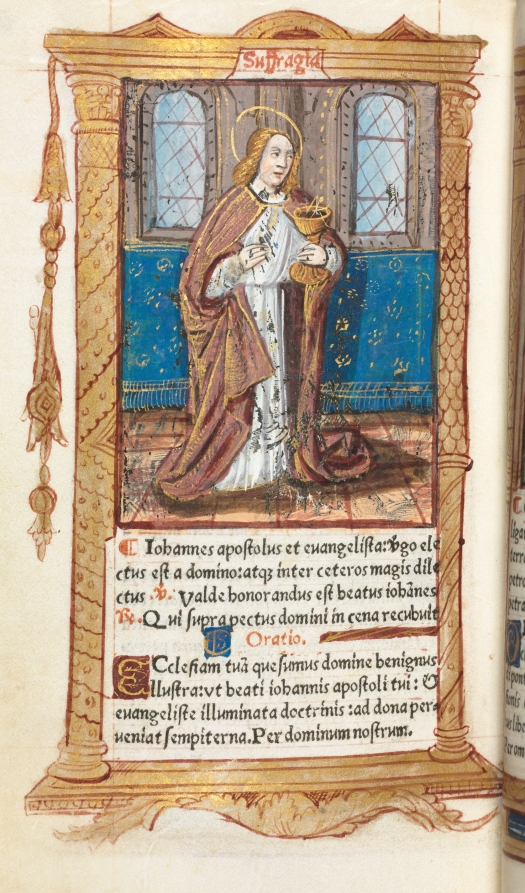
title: Printed Book of Hours (Use of Rome): fol. 98v, St. John the Evangelist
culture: France, Paris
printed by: Guillaume Le Rouge (French, Paris, active 1493–1517)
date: 1510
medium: 112 Printed folios on parchment, bound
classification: Bound Volume